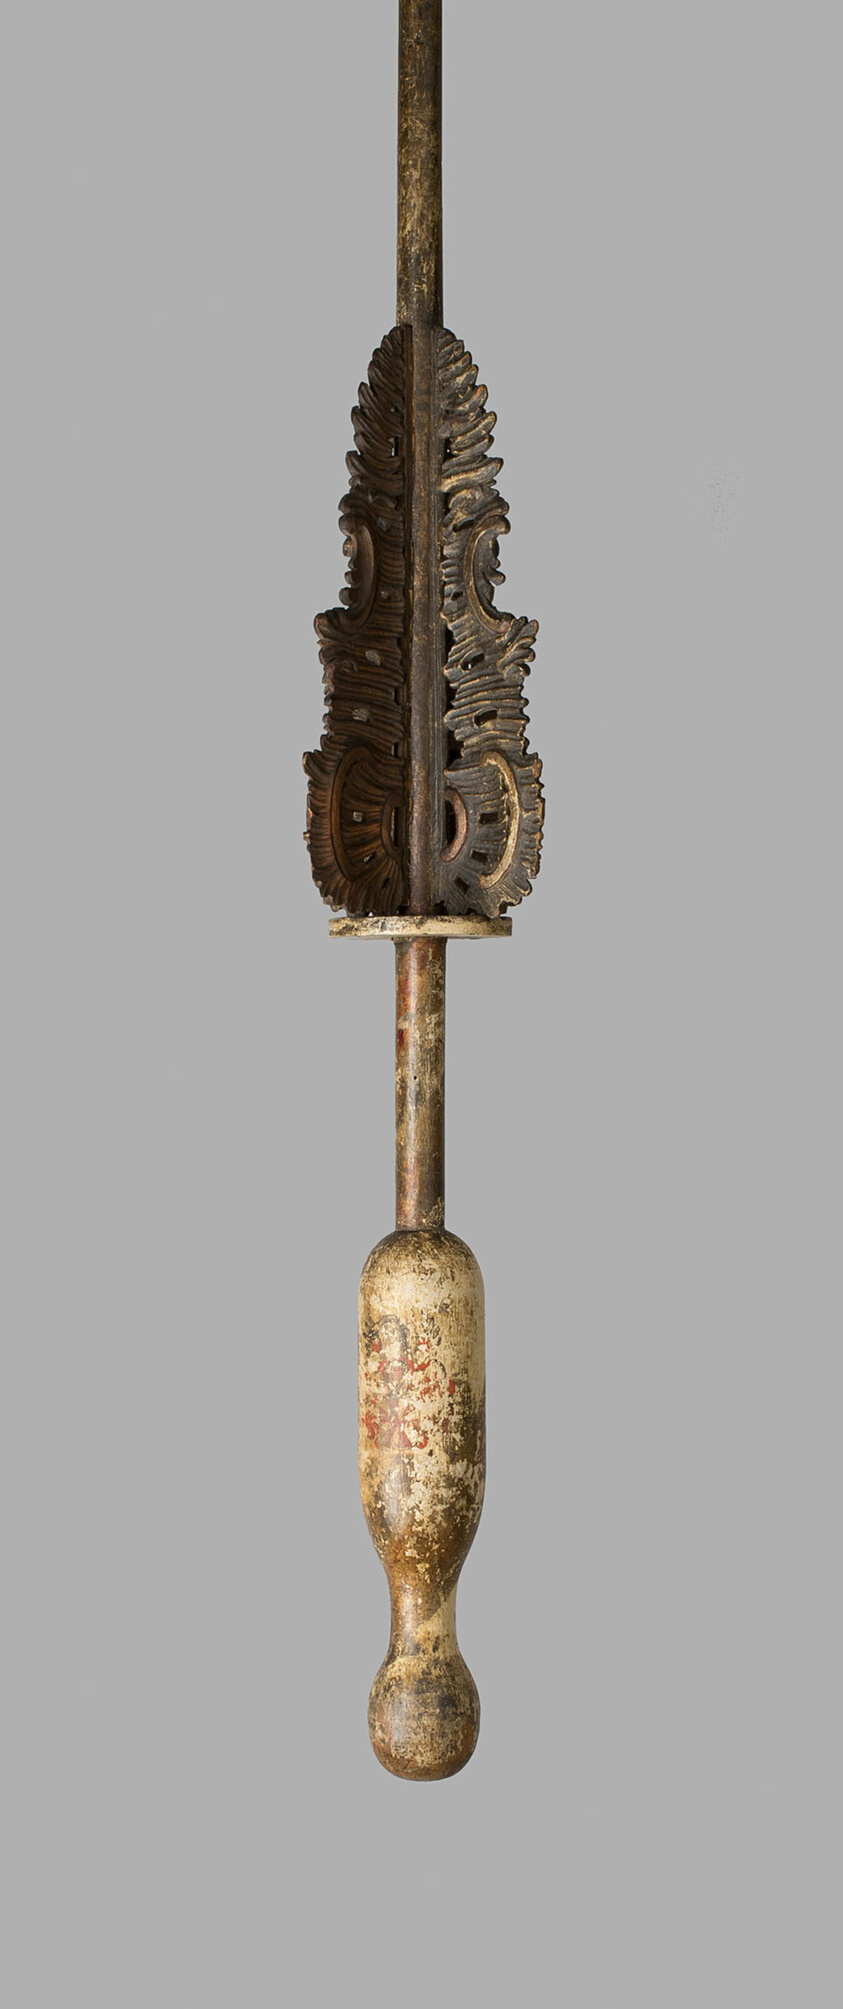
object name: Arms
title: Lance for the Carousel (Running at the Ring)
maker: German, Dresden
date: 1700-1750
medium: Iron, wood, and paint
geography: Dresden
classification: edged weapon-staff; arms; arms and armor